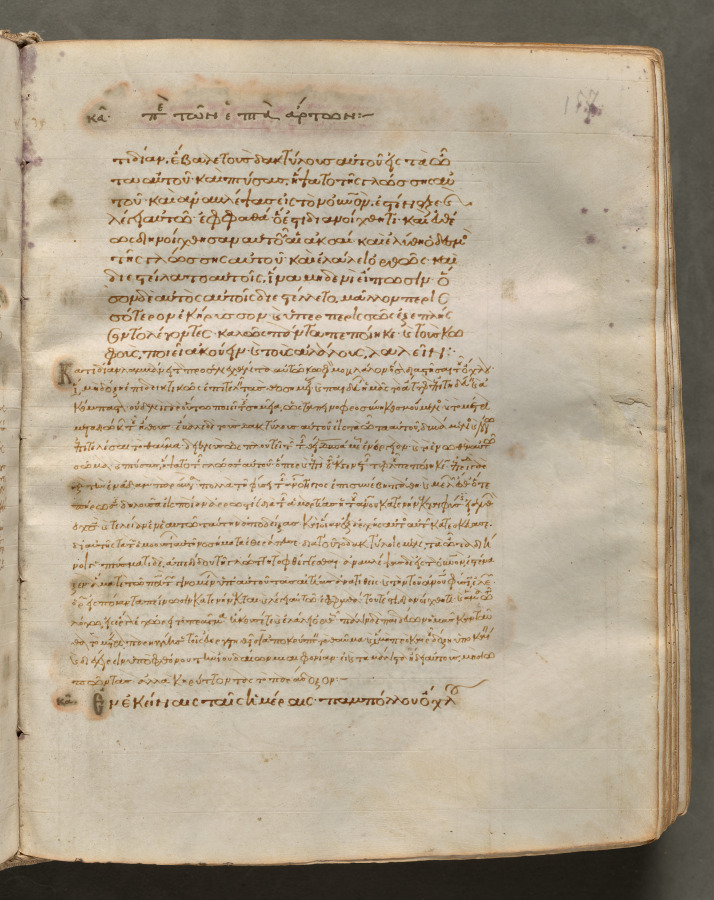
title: Text, folio 157 (recto), from a Gospel Book with Commentaries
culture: Byzantium, Constantinople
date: c. 1000–1100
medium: ink, tempera, and gold on vellum; leather binding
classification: Bound Volume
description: Each of the four gospels in this book opens on a page with brilliantly illuminated borders depicting the author of the text as well as birds-principally peacocks, symbols of the immortality of the soul-and fountains, representing the fountain of life and the salvation of the soul. This volume consists of 428 leaves with texts in Greek. Its level of sophistication suggests that it was probably written and decorated in a monastery in Constantinople.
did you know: Gospel Books were carried in procession through Byzantine churches.